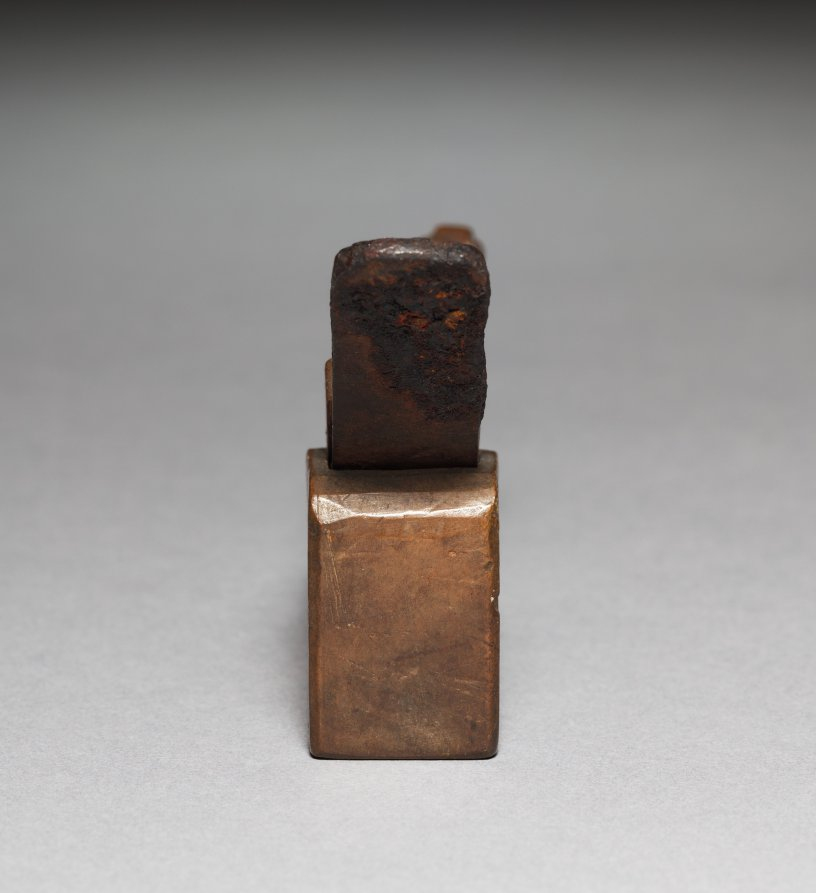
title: Plane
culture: Europe, 18th century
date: 1700s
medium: wood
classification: Tool